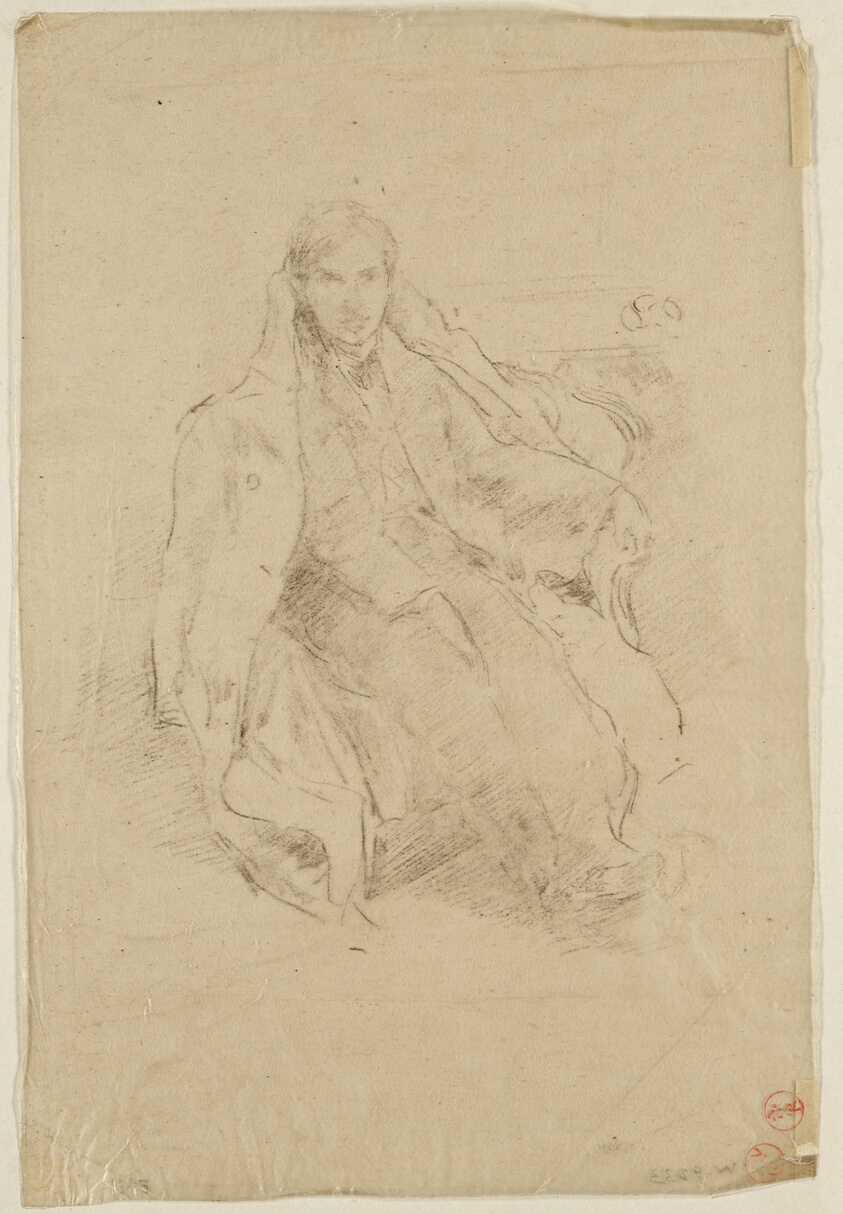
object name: Drawing and Watercolor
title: H.C. Pollitt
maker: James McNeill Whistler (American, 1834-1903)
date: 1896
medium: Lithographic crayon on thin, transparent transfer paper, tipped onto card (modern mount)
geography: United States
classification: lithographic crayon; drawings (visual works); prints and drawing; paper